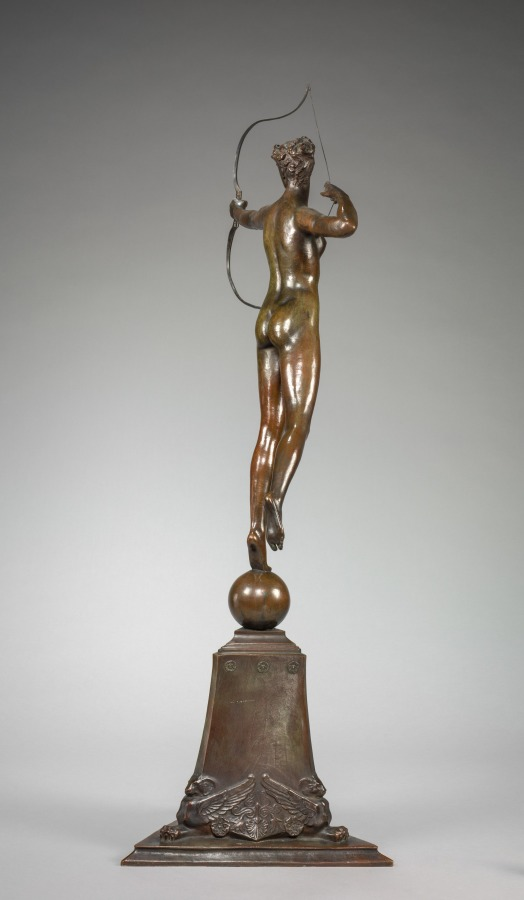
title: Diana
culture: America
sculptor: Augustus Saint-Gaudens (American, born Ireland, 1848–1907)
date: modeled 1899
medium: bronze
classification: Sculpture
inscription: Signed and dated on base: AUGUSTUS SAINT GAUDENS, MDCCCXCIX; inscribed on triangular base: DIANA OF THE TOWER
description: Depicting the Roman goddess of the hunt, Diana is a small version of the massive weathervane Augustus Saint-Gaudens designed for the second iteration of Madison Square Garden in New York, a building that was demolished in 1925. Although controversial for its nudity, the weathervane dominated the city's skyline and became a prominent landmark. Due to its popularity, Saint-Gaudens marketed tabletop versions of the sculpture, which were sold through high-end retailers such as Tiffany and Co.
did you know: The face of Diana was inspired by Davida Johnson Clark, the artist's longtime model, muse, and lover.